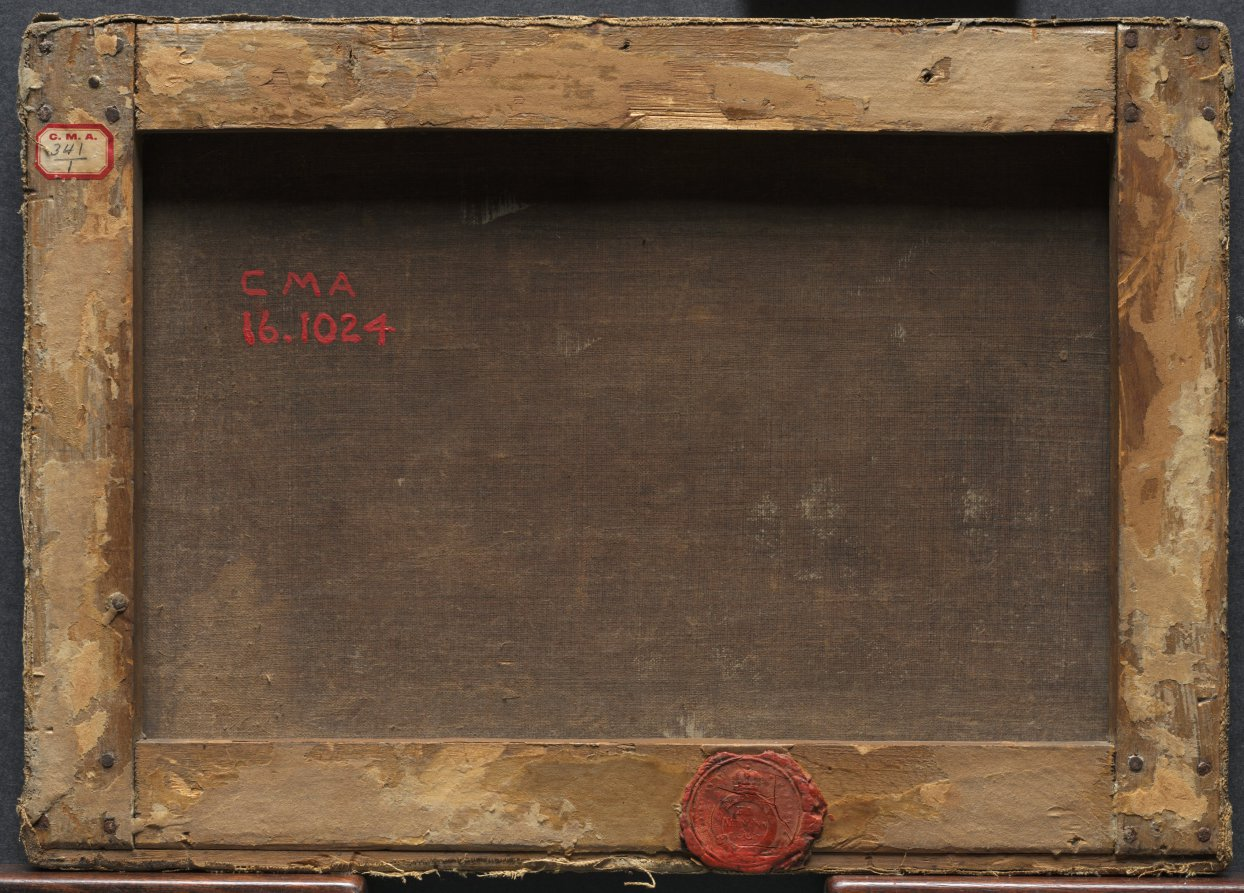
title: Diana and Her Nymphs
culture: Hungary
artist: Károly Markó (Hungarian, 1791–1860)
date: 1853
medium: oil on fabric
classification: Painting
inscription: Signed lower left: C. Markó p. Ap. 1853